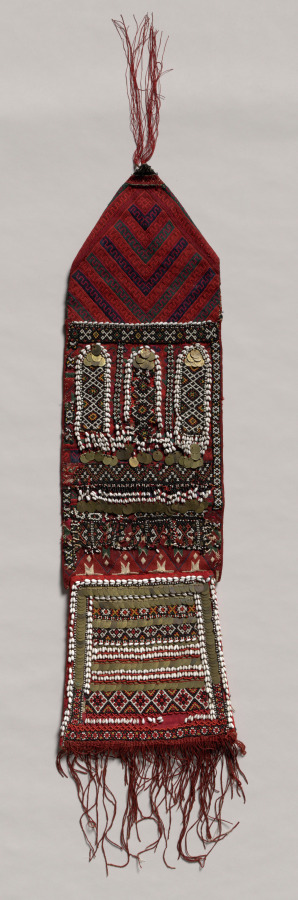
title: Headdress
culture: probably southeastern Europe, Balkans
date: 1800s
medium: Linen, shells, glass beads, metal coins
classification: Garment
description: This long, colorful headdress would hang over the head and down a woman's back. It consists of several panels of linen sewn together, and densely embroidered with silk thread. On the middle panel, small black, red, white, yellow, and red beads are stitched to create geometric designs. Double rows of small cowrie shells outline them, and metal coins with a crescent moon motif also feature in the decoration. These are first punctured, then stitched onto the textile. The lowermost edge is finished with a red fringe.